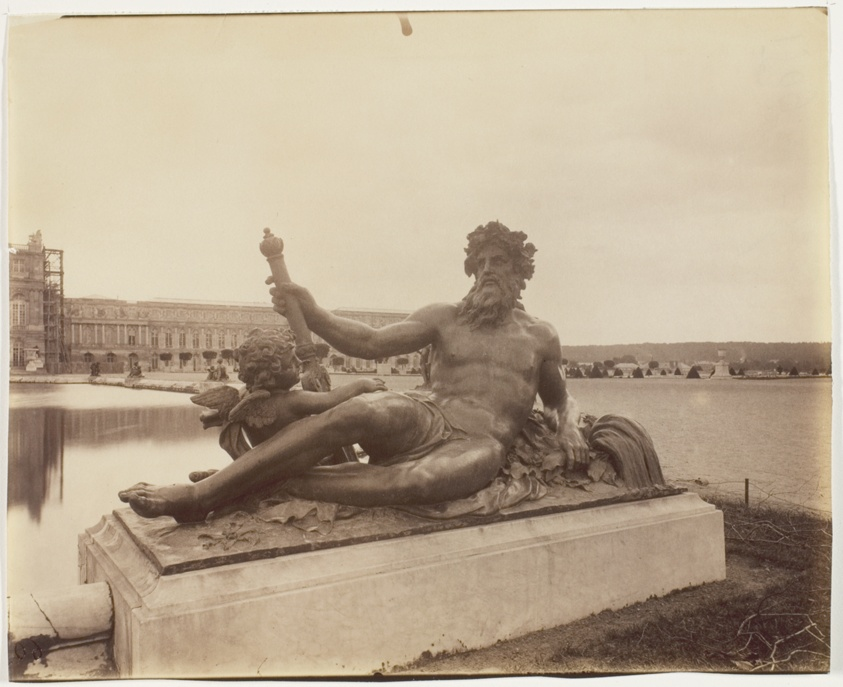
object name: Photograph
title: Versailles, Le Rhone par Tuby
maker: Jean-Eugène-Auguste Atget (French, 1857–1927)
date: 1901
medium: Albumen print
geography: France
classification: albumen silver print; photographic process; photography; photograph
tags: Collected by Hugh Edwards